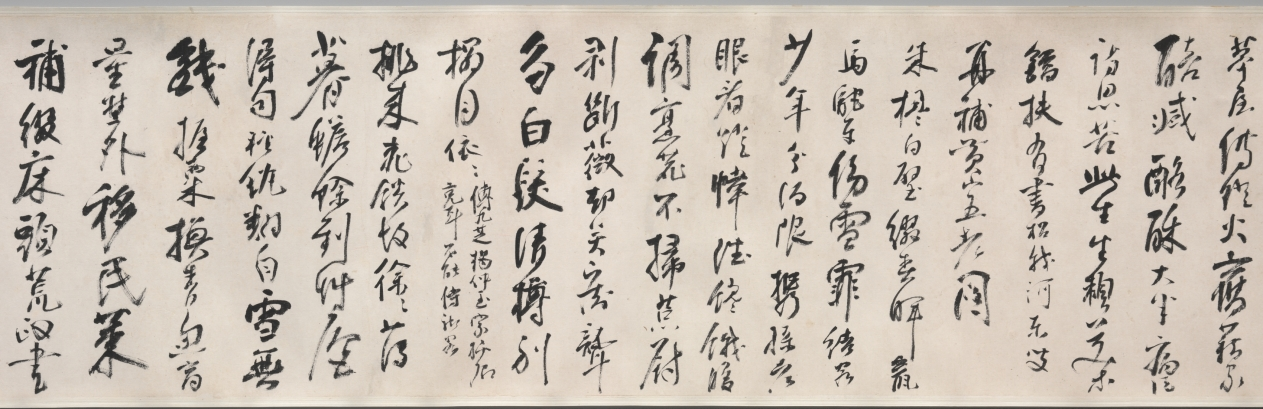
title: Snow Coloring the World White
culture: China, Qing dynasty (1644-1911)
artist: Fa Ruozhen (Chinese, 1613–1696)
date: 1690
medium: handscroll, ink on paper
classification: Painting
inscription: Artist's title on frontispiece, colophon with 6 poems, and 7 seals: [seal] Ch'ien-k'un i ts'ao t'ing. Snow Coloring the World White. Huang-shan lao-jen, Jo-chen, at the age of seventy eight. [2 seals] Fa yin Jo-chen; Huang-shih shih. (Artist's poems are not translated.) In the first month of the keng-wu year [1690], 1 was seventy-eight years old. On a snowy day I was pleased to have my good son-in-law Ch'eng-ssu and other gentlemen visiting me at my Tz'u-ching Hall at Yellow Hill. I did this snowscape to record the event. [2 seals] Fa Jo-chen; Tun Chai. [2 seals at end of painting] Fa yin Jo-chen; Huang-shih shih. trans. LYSL/WKH 12 additional seals: 8 of Ho Kuan-wu (20th c.); 1 of Wang Nan-p'ing (20th c.); 3 unidentified.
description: Fa Ruozhen was a scholar-official and prolific poet who focused on painting as his government career declined. The inscription records that he was 78 years old when he painted this handscroll to welcome visitors on a snowy day. At this point in his artistic development, Fa created expressive landscapes and experimented with unconventional brushwork. This handscroll begins at the right with gentle hills dotted with evergreens and bare deciduous trees. By the end, the twisting rocky forms dominate. Fa’s official career spanned the fall of the Han Chinese Ming dynasty (1368–1644) and the rise of the Manchurian Qing dynasty (1644–1911). While other scholar-officials who declined to serve the Manchus had their reputations enhanced, critics accused Fa of disloyalty for serving in the new bureaucracy. Fa was deeply sensitive about this criticism. In many of his 4,000 known poems, he responded by emphasizing the Confucian virtue of being a good administrator particularly during an unstable time. Fa’s “disorderly” brushwork and distressed landscapes seem to reflect the political upheaval of his era.